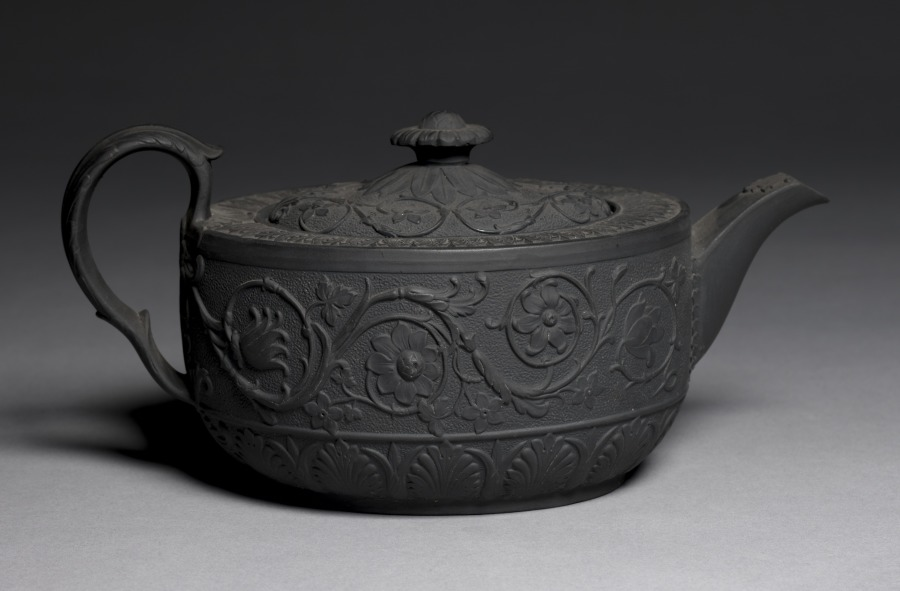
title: Teapot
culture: England, 19th century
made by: Elijah Mayer & Son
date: c. 1810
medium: black basalt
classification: Ceramic